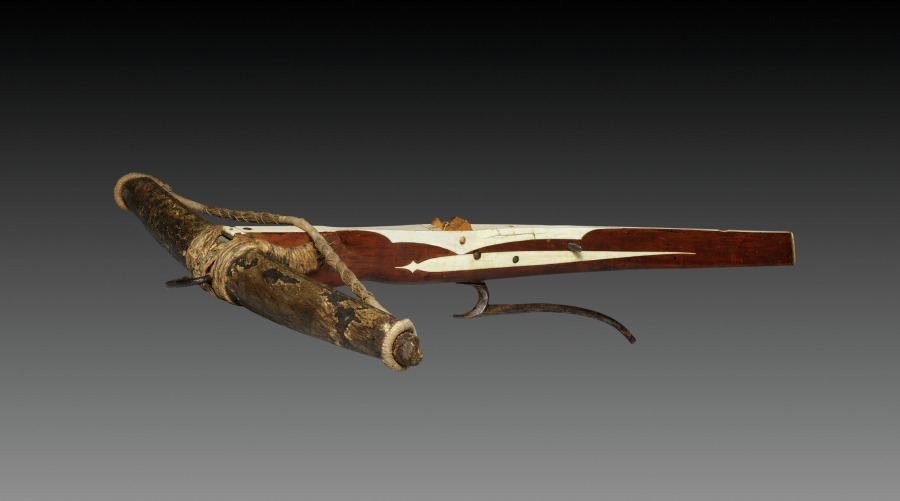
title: Crossbow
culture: Germany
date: c. 1460–70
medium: wood (walnut?) inlaid with bone; horn; iron and steel; composite bow (horn and parchment)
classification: Arms and Armor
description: The cranequin, or winding device sitting on top of the crossbow, made it easier to span for reloading. With a full quiver, a container for bolts and arrows, a hunter could bring home plenty of meat.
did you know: In every army in Europe crossbowmen were considered an elite corps, and as such occupied the central position in battle formations.